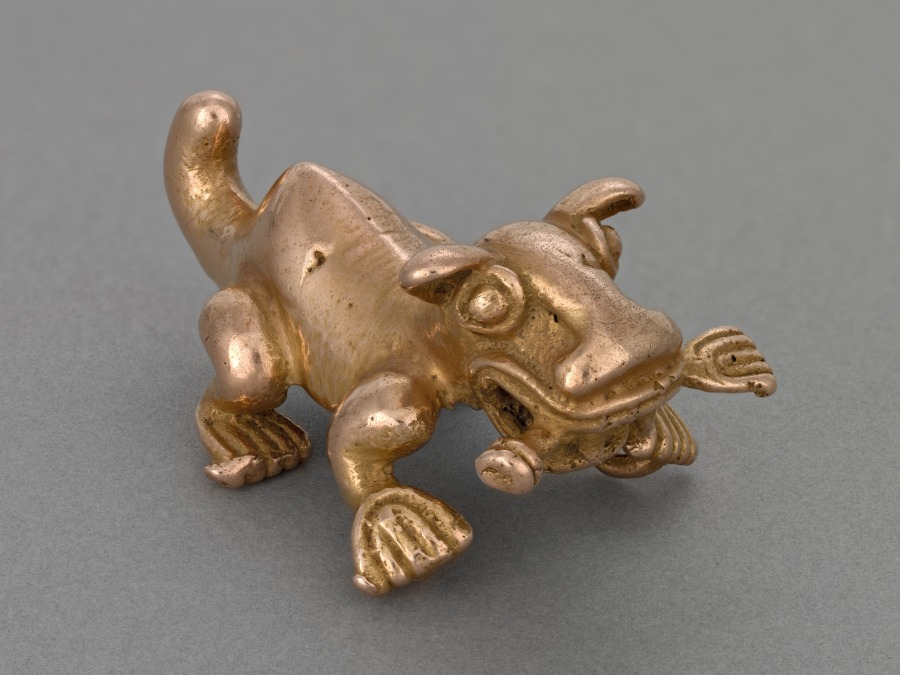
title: Feline Pendant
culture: Isthmian Region, Panama-Costa Rica, Veraguas-Chiriquí style, 11th century-16th century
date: 1000–1550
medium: gold, cast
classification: Metalwork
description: This memorable jaguar pendant is a nasty precious—nasty because it holds a severed limb (probably human) in its fanged mouth but precious due to its material, its well-polished silky surface, and the charming rendering, which reduces the jaguar to cartoon-like essentials. The warm, rosy color is the result of copper in the alloy.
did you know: In the Panama-Costa Rica region gold ornaments were associated with political and religious authority.